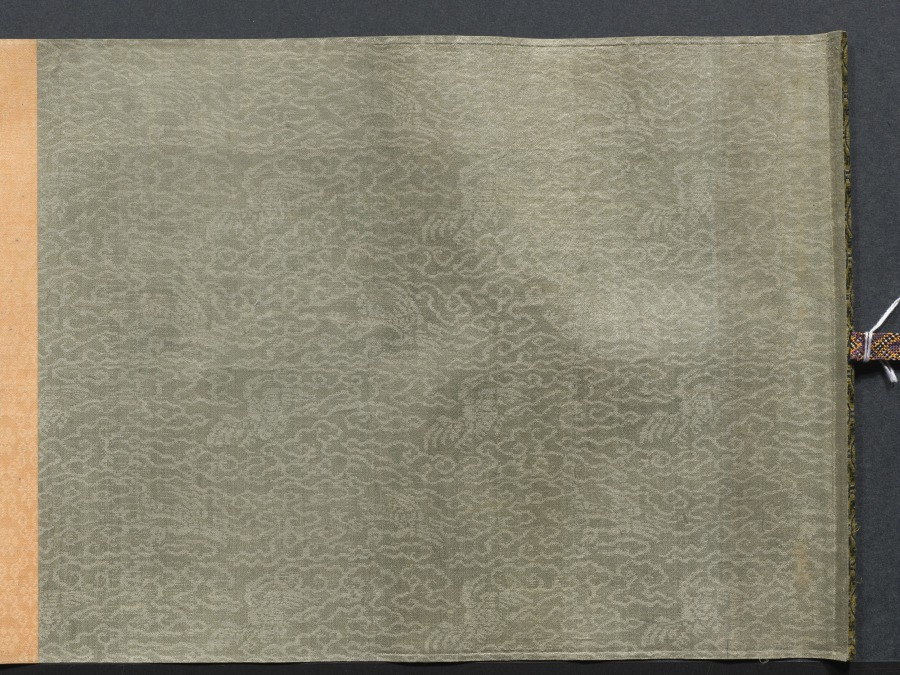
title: Flowers of Four Seasons, with Poems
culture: China, Ming dynasty (1368–1644)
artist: Wang Guxiang (Chinese, 1501–1568)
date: 1531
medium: handscroll; ink and light color on silk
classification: Painting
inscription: Artist's inscription, signature, and 15 seals. Ink Orchids. Sewn as pendants for the man of worth, swaying quiety, fragrance in the valley. [seal] Hsiao-chu ts'un Peony. Wiping his face, the young gentleman Ho [Ho Yen of Wei, Three Kingdoms] appears to have been powdered. His previous life was the perfume-stealing Han Shou [of Chin, 265–419 CE], the fragrance still lingers. [seal] Ts'un-wu chai. Flowering Crab Apple, New Bamboo. Shao-lin [Du Fu, 712–770] had to put down his brush. [Flowering Crab Apple]. Yü-k'o [Wen T'ung, d. 1079) in vain wrote poems about [Bamboo]. [seal] Yu-shih. Lotus Flowers. When she turns her head, half-hidden by a fan, and casts a glance, all the beautiful women become colorless. [seal] K'ang yüeh huai. Loquat. Ripeness in summer. [seal] Lu-chih. Pomegranate Flower. Whenever I remember you I will send my thoughts, but where have you gone--the [skirt] of pomegranate red? [seal] Wu-ho Sheng. Day Lily. Plant the day lily to forget sorrow. [seal] Yu-shih. Chrysanthemum. The untrammelled joy at the eastern fence. [seal] Lu-chih. Begonia. Comparing it to the beauties of Spring, and spreading them out as trimming for the stone steps. [seal] Yu-shih. Hibiscus. In recent years I have always enjoyed looking at flowers; instead of dark red I preferred pink ones. [seal] Jen-sheng i-lou. Narcissus, Camellia. The jade girdle left behind at Lo River. [Narcissus]. The precious pearls glitter before Spring. [Camellia]. [seal] Lu-chih. Heavenly Bamboo (Nandina domestica). A single branch in the wintry season. [seal] K'ang yüeh huai. Plum. Fragrant snow in the Lo-fou Mountains. [seal] Ts'un-wu chai. In the eleventh lunar month of the hsin-mao year of the Jiaqing era [1531], [I] imitated the boneless style of Yüan masters in sketching from life. Guxiang [seals] Yu-shih; Lu-chih. Translated by Wai-kam Ho/Lingyun Shih Liu (1980)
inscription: 2 colophons and 23 additional seals: 1 colophon dated 1632, and 2 seals of Li Jih-hua [Li Rihua] 李日華 (1565–1635); 1 colophon and 2 seals of Xiang Shengmo 項聖謨 (1597–1658); 3 seals of Liang Qingbiao 梁清標 (1620–1691); 6 seals of the Jiaqing 嘉慶 emperor (r. 1796–1820); 9 seals of Ch'eng Ch'i [Cheng Qi] 程琦 (1911–1988)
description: In this painting, flowers are loosely arranged by the seasons: narcissus and peony represent early spring; yellow loquat and lotus, summer; chrysanthemum, autumn; and the plum and evergreen bamboo, winter. The artist added to each flower a poetic line of calligraphy associating each plant with a historic or legendary figure. For example, the chrysanthemum, along with the line “The untrammeled joy at the eastern fence,” refers to the poet Tao Yuanming (died AD 427) who enjoyed chrysanthemums at the eastern fence in his garden. The scroll illustrates Wang Guxiang’s mastery of free brushwork, combining light monochrome ink with transparent colors. In his inscription, Wang says he used the “boneless” style without outlines as developed during the Yuan dynasty (1279–1368). Wang was a native of Changzhou, a city in southeast China known for its rich flora and fauna, and flower-and-bird painting tradition.